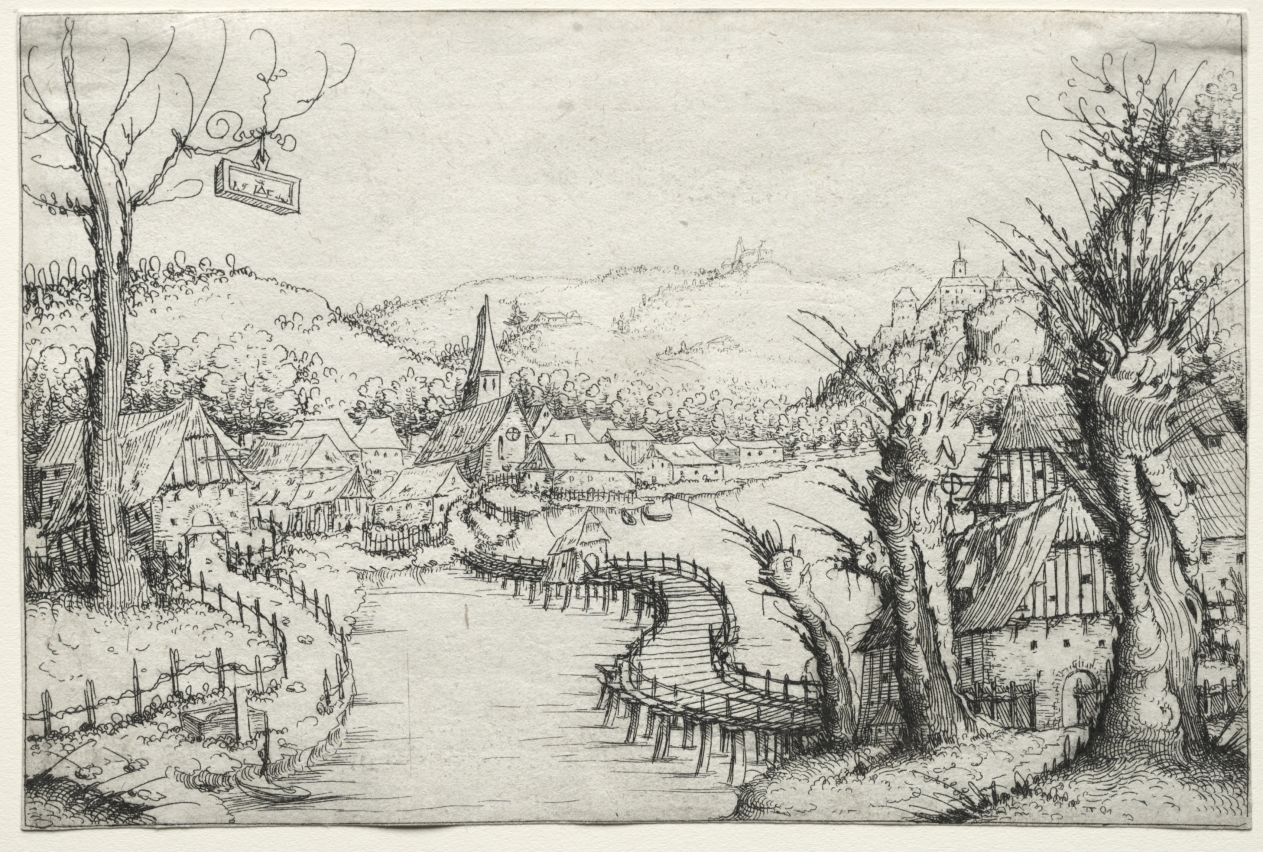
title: River Landscape with Three Bare Willow Trees at Right and a Long Winding Wooden Bridge at Center Leading to a Village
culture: Germany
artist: Augustin Hirschvogel (German, 1503–1553)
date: 1546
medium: etching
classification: Print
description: Within a decade, Augustin Hirschvogel and Hanns Lautensack were aware of the landscapes by Wolfgang Huber and Albrecht Altdorfer and began to expand their artistic vocabulary. Hirschvogel probably made this group of etchings after traveling down the Danube from Nuremberg, through Regensburg and Passau, to his residence in Vienna. The many buildings, cultivated fields, and roads emphasize human activity and its mark on the landscape but always in the service of articulating a particular topography. Hirschvogel’s etchings found an international audience, informing the development of the landscape genre as far away as Italy and the Netherlands.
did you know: An early adopter of etching, Augustin Hirschvogel was among the first artists in Germany to use a copper, rather than iron, etching plate.